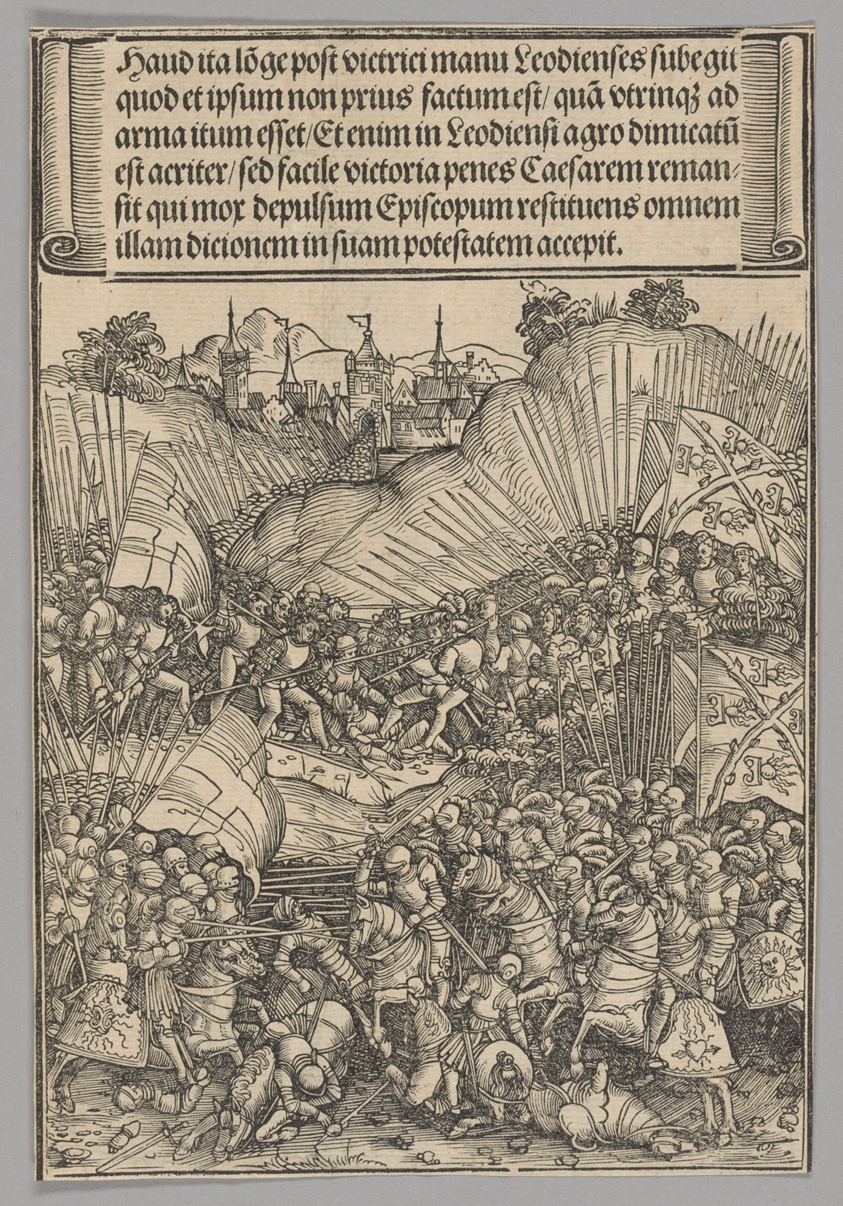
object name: Print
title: Battle for Liège, plate 8 from Historical Scenes from the Life of Emperor Maximilian I from the Triumphal Arch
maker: Wolf Traut (German, c. 1480-1520); printed by Hieronymus Andreae (German, died 1556)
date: 1515-17, printed c. 1520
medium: Woodcut in black ink on cream laid paper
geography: Germany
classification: print; paper; woodcut; prints and drawing